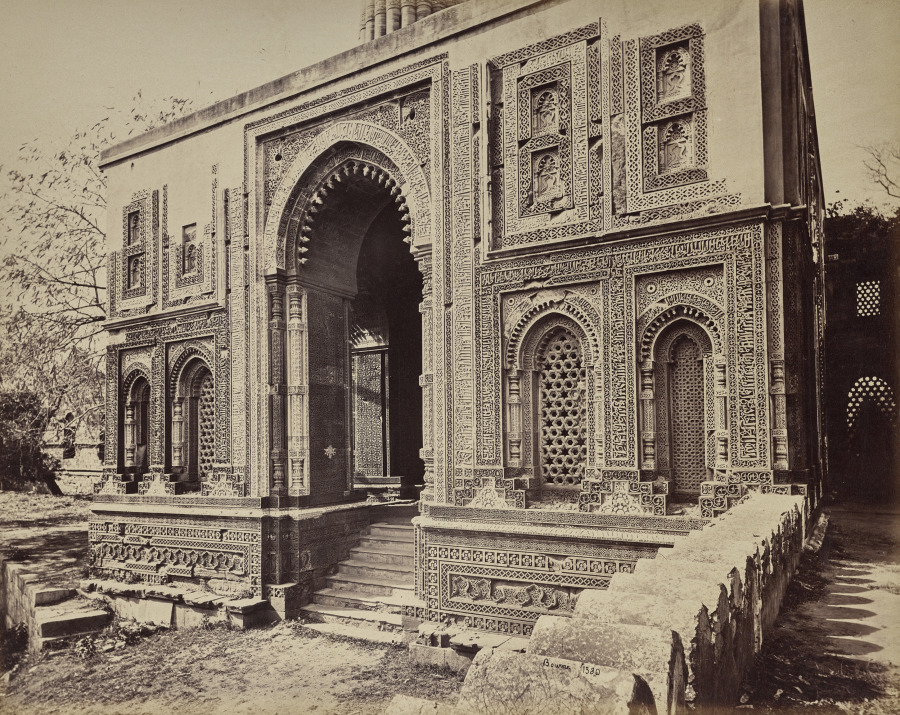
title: Delhi. Gateway of Allahood Deen's Palace, Old Delhi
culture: England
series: Photographs of Northern India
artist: Samuel Bourne (British, 1834–1912)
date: 1863–70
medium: albumen print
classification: Photograph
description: The 50 images in this album, all taken in the 1860s, move from the hill towns of the Himalayas down to cities including Lahore (now in Pakistan), Delhi, Lucknow, Agra, Benares (now Varansi), and Calcutta (now Kolkata). Architectural studies of major monuments offer valuable historical records of what sites such as the Taj Mahal and the imperial mosque of the Mughal emperors in Delhi looked like before 20th-century restorations.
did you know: Samuel Bourne, the author of most the images in this album, was a banker in England before he moved to India to become a professional photographer.